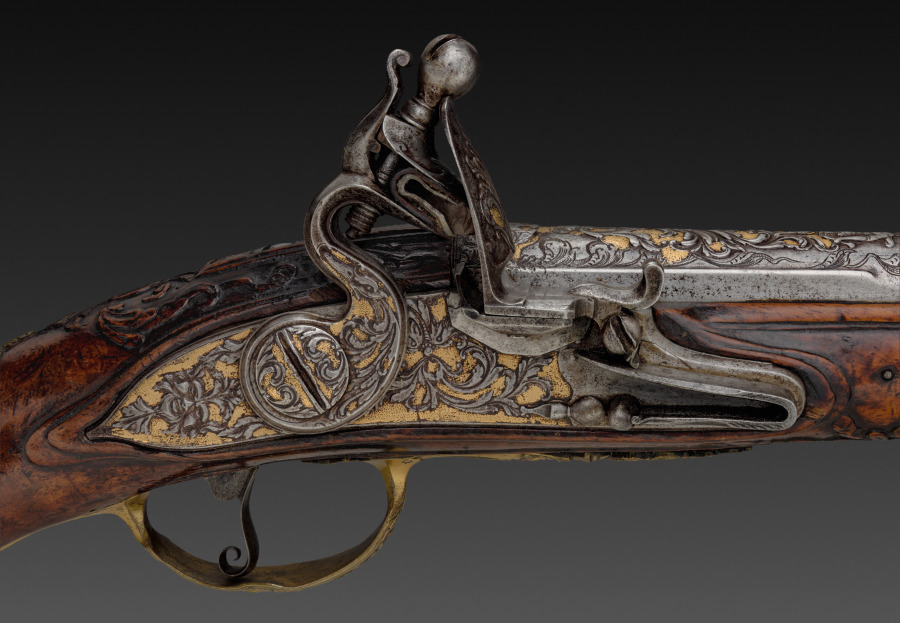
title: Flintlock Pistol (1 of 2)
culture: Franco-Flemish, Liège, early 18th century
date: early 1700s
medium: steel with gold inlay, gilt-brass mounts; walnut burl stock; chiseled high-relief decoration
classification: Arms and Armor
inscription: on barrel: G. MASSIN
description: The exquisite ornament along the breech of the barrel is chiseled and engraved. The barrel of this pistol is signed g. massin, the name of a gunsmith working in eastern France or French-speaking Flanders, possibly the city of Liège.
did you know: The flintlock ignition system was developed in the 1600s and remained the dominant system until the early 1800s.